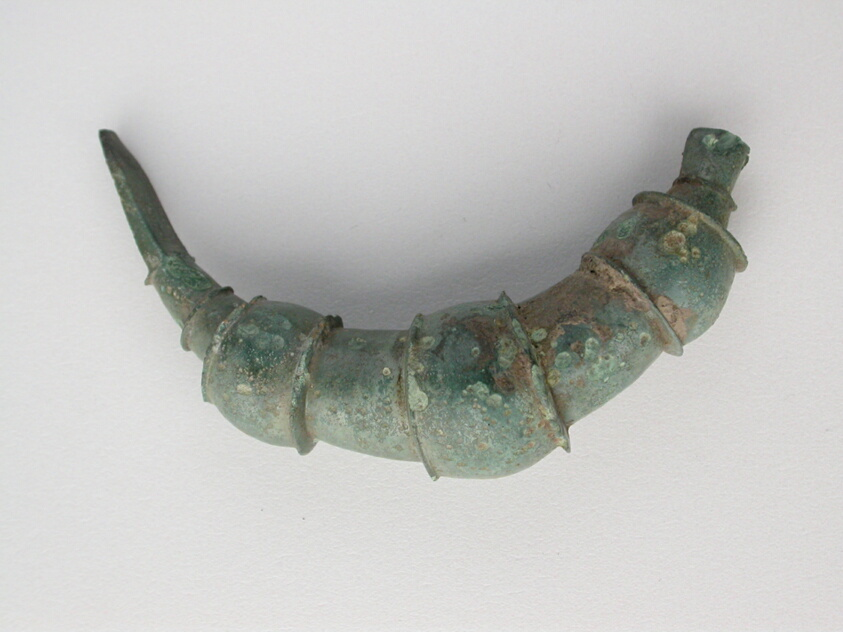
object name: Costume and Accessories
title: Bow Fibula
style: geometric, ancient, greek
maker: Greek; Thessaly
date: Geometric Period (800–700 BCE)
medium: Bronze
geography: Greece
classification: votive offering; jewelry; ex-voto; fibula; costume